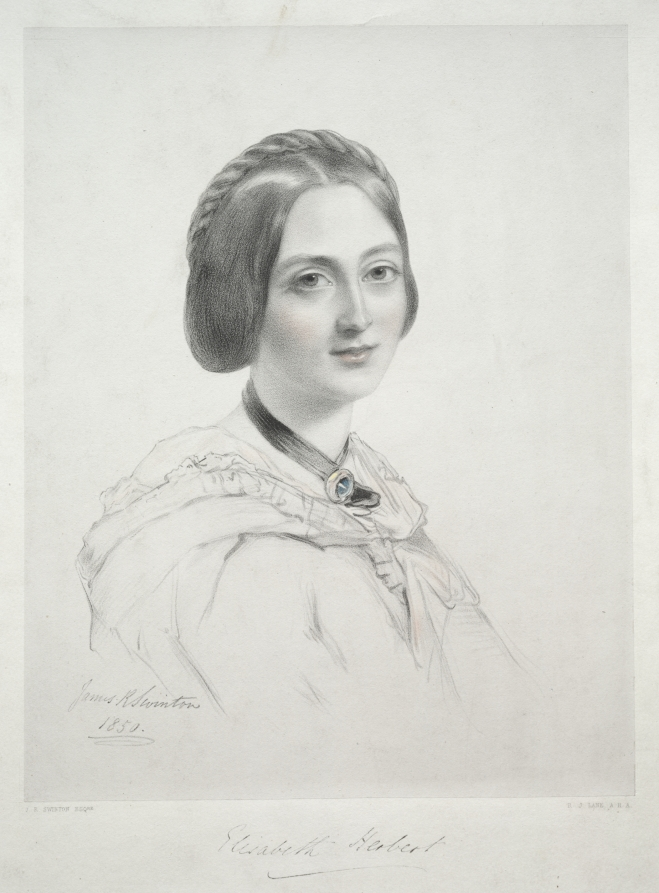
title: Lady Elizabeth Herbert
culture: France, 19th century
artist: Richard James Lane (British, 1800–1872)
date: 1850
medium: lithograph, hand colored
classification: Print